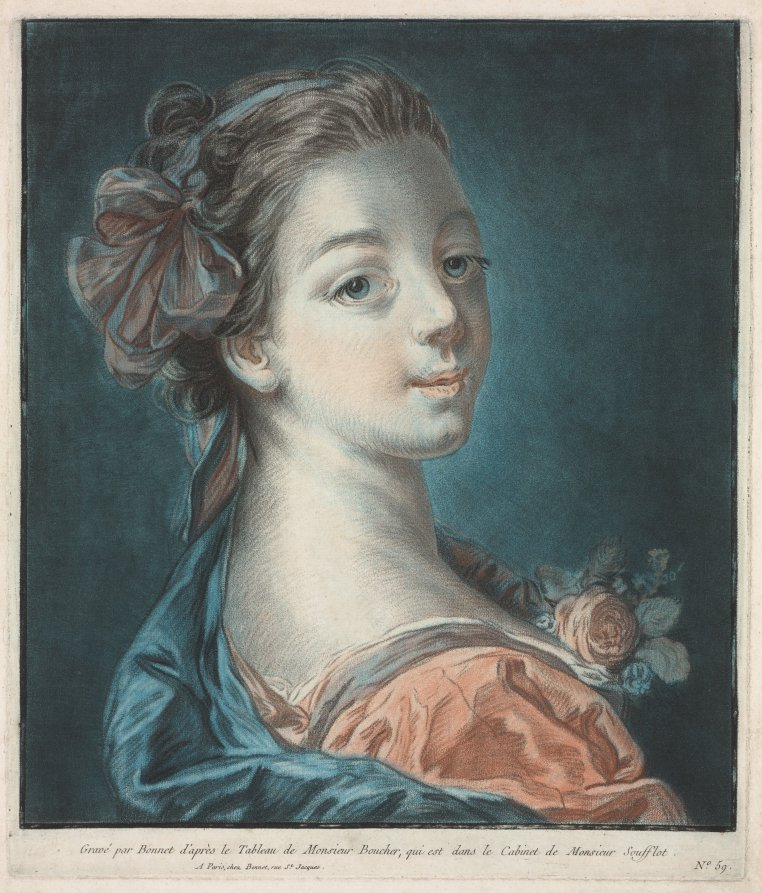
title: Head of a Woman (Mme. Deshayes?)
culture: France, 18th century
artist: Louis-Marin Bonnet (French, 1736–1793)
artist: after François Boucher (French, 1703–1770)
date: c. 1771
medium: color chalk-manner etching and engraving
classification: Print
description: To produce this print, Bonnet used three different printing plates to layer black ink, then semitransparent blue ink, and finally a thicker red pigment onto white paper. After the first run through the press, Bonnet had to carefully align each subsequent plate to achieve the desired coloration. Although the identity of this young woman is unknown, she may be Boucher’s daughter, Jean-Elisabeth Victoire, who married Jean-Baptiste Henri Deshays, a pupil of Boucher.